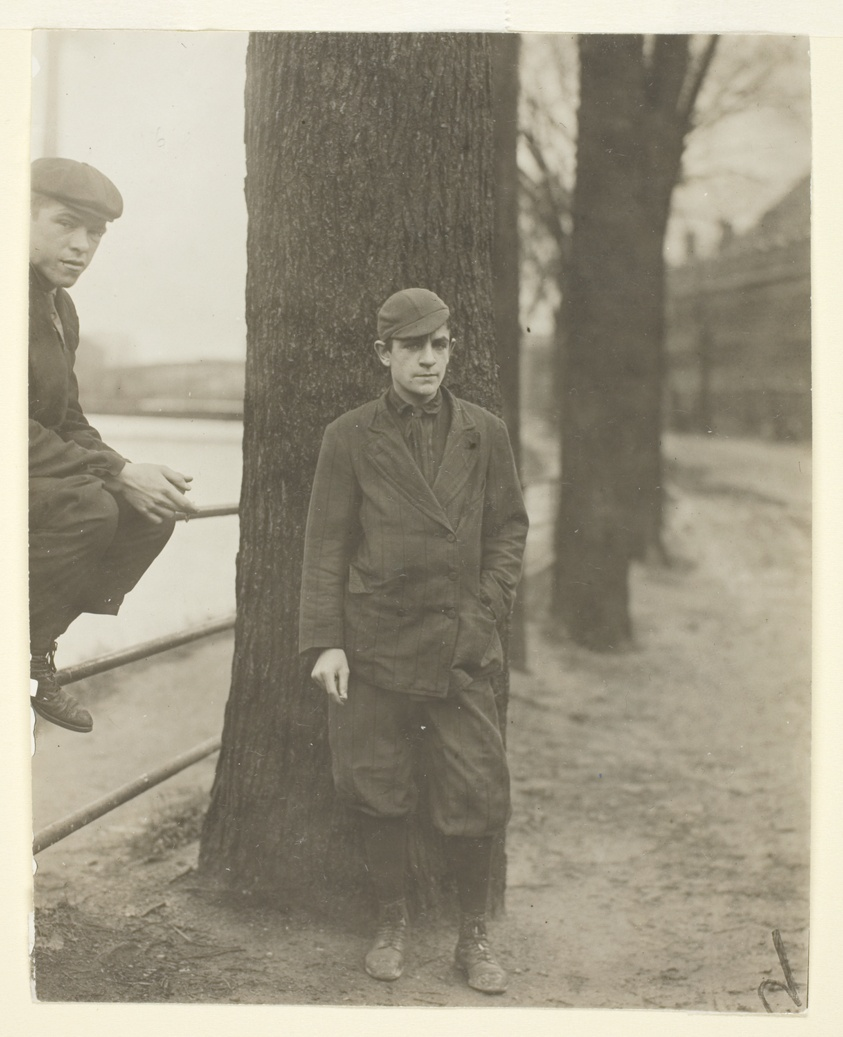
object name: Photograph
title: Bleach Room Boy, Leon Halcourt, 16 Years Old, Lawrence, Massachusetts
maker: Lewis Wickes Hine (American, 1874–1940)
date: November 1910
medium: Gelatin silver print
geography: United States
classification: gelatin silver (developing-out-paper) pr; photographic process; photography; photograph